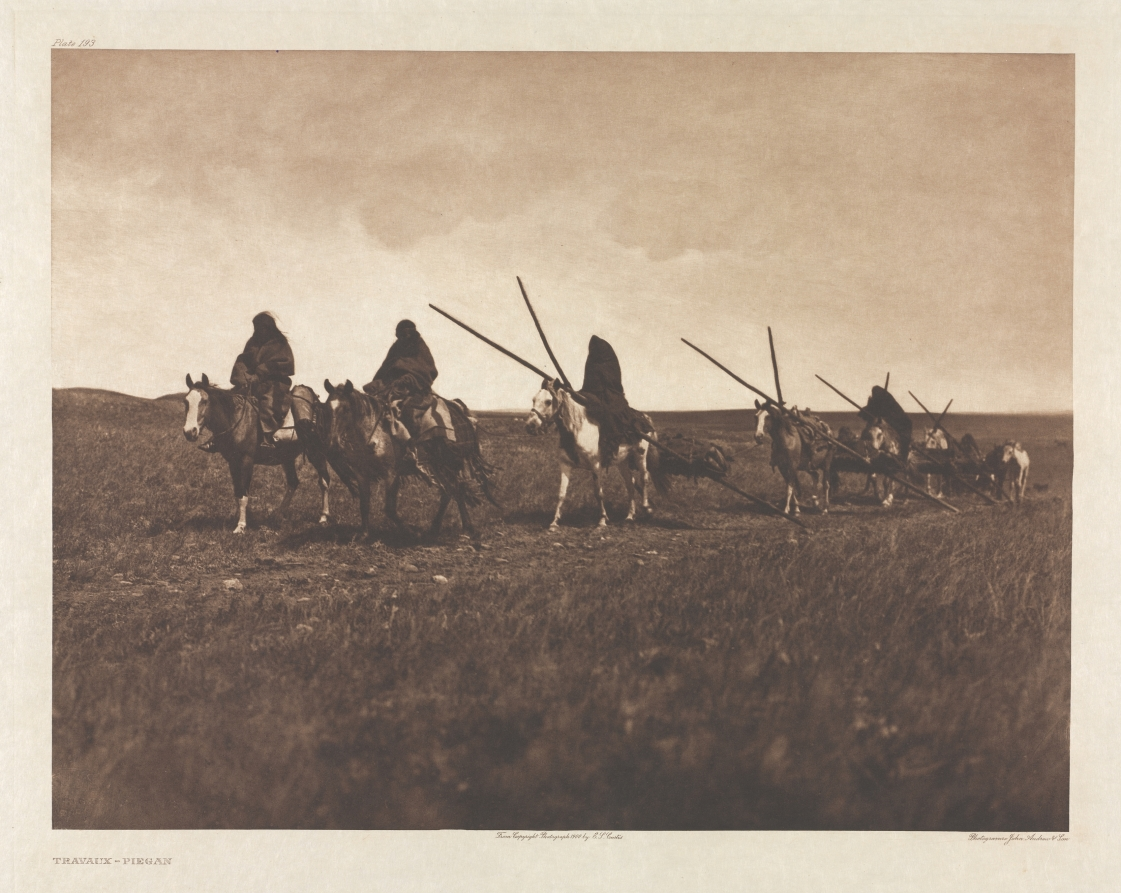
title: Portfolio VI, Plate 193: Travaux--Piegan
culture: America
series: The North American Indian: being a series of Portfolios picturing and describing the Indians of the United States, the Dominion of Canada, and Alaska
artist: Edward S. Curtis (American, 1868–1952)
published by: The University Press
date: 1900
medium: photogravure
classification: Portfolio